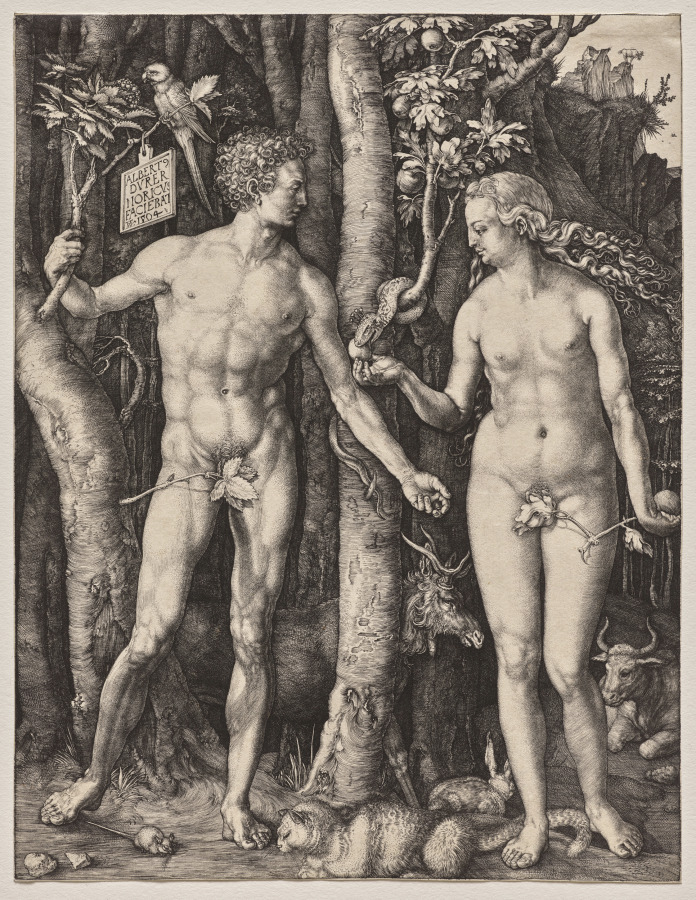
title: Adam and Eve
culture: Germany, early 16th Century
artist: Albrecht Dürer (German, 1471–1528)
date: 1504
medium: engraving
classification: Print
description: Albrecht Dürer’s iconic engraving was hugely impactful to the spread of natural symbolism in Europe. Drawing upon Classical sculptural models, he represented Adam and Eve in perfect, uncorrupted beauty moments before tasting the forbidden fruit. The tree of knowledge, with its writhing serpent, is a fig tree, and the tree of life, which Adam clasps, a mountain ash, native to Northern Europe. The elk, rabbit, cat, and ox are symbols of the four human temperaments—melancholic (gloomy), sanguine (sensual), choleric (cruel), and phlegmatic (slothful)—in perfect balance. But the cat and mouse hint at aggression to come, and the parrot, appearing like a beacon in the dark northern forest, heralds the promise of the Virgin Mary (the new Eve).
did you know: Albrecht Dürer set the Garden of Eden in a northern forest, with the tree of knowledge represented by a fig tree and the tree of life, a mountain ash.